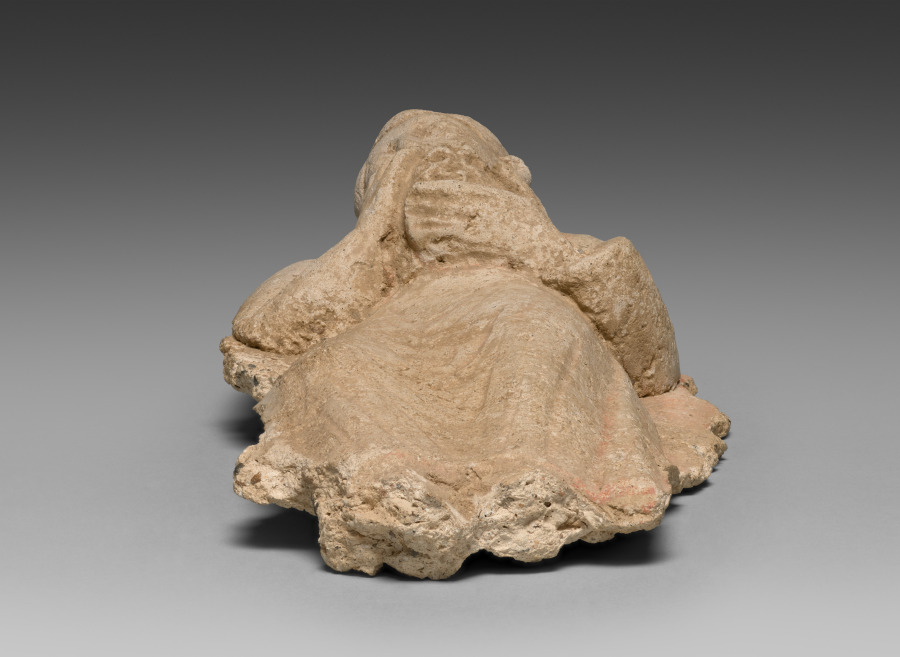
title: Monk bearing offerings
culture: Afghanistan, Hadda, probably Tape Shotor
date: c. 300 CE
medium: stucco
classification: Sculpture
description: This Buddhist monk wears a robe over one shoulder, and his hair has been shaved. He reverently brings offerings of fruit or flowers to the Buddha. Triads depicting the Buddha with attendants bringing offerings were set up on the base of monuments called stupas, in niches defined by pilasters with Corinthian-style columns indicative of the region's Hellenistic heritage.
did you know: This sculpture came from a monastery famous for preserving pieces of the Buddha's skull and robe.